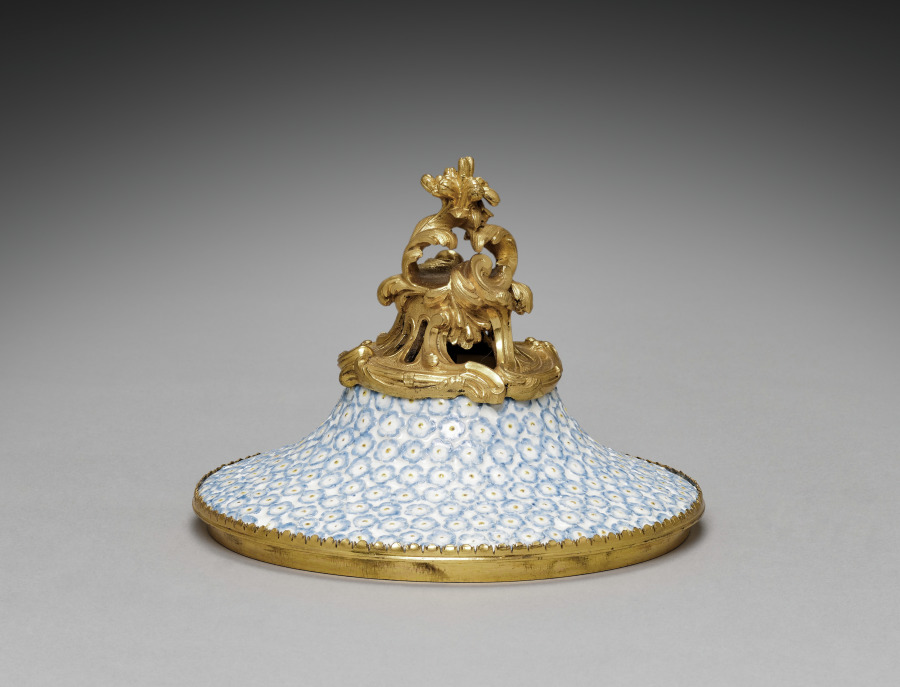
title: Cover for a Vase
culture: Germany, Meissen, 18th century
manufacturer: Meissen Porcelain Factory (German, est. c. 1710)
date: 1749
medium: porcelain mounted in gilt bronze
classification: Ceramic